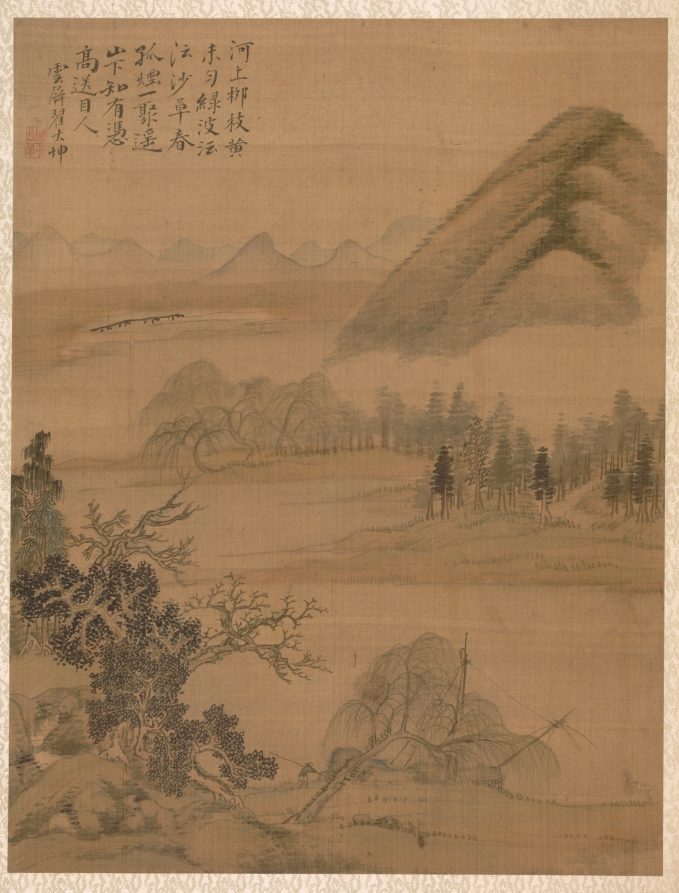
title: Landscape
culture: China, Qing dynasty (1644-1911)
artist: Zhai Dakun (Chinese, d. 1804)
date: 1775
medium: album leaf; ink and color on silk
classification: Painting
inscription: Willow Branches in Spring Over the river the willow branches are only partially yellow, The green waves rush by the sand and grass in spring, Lonely clouds cluster below the distant mountains, One can only see them from a great height. Yunping Zhai Dakun. Seals: 1) r/i "Dakun" 2) r/r "Zihou"